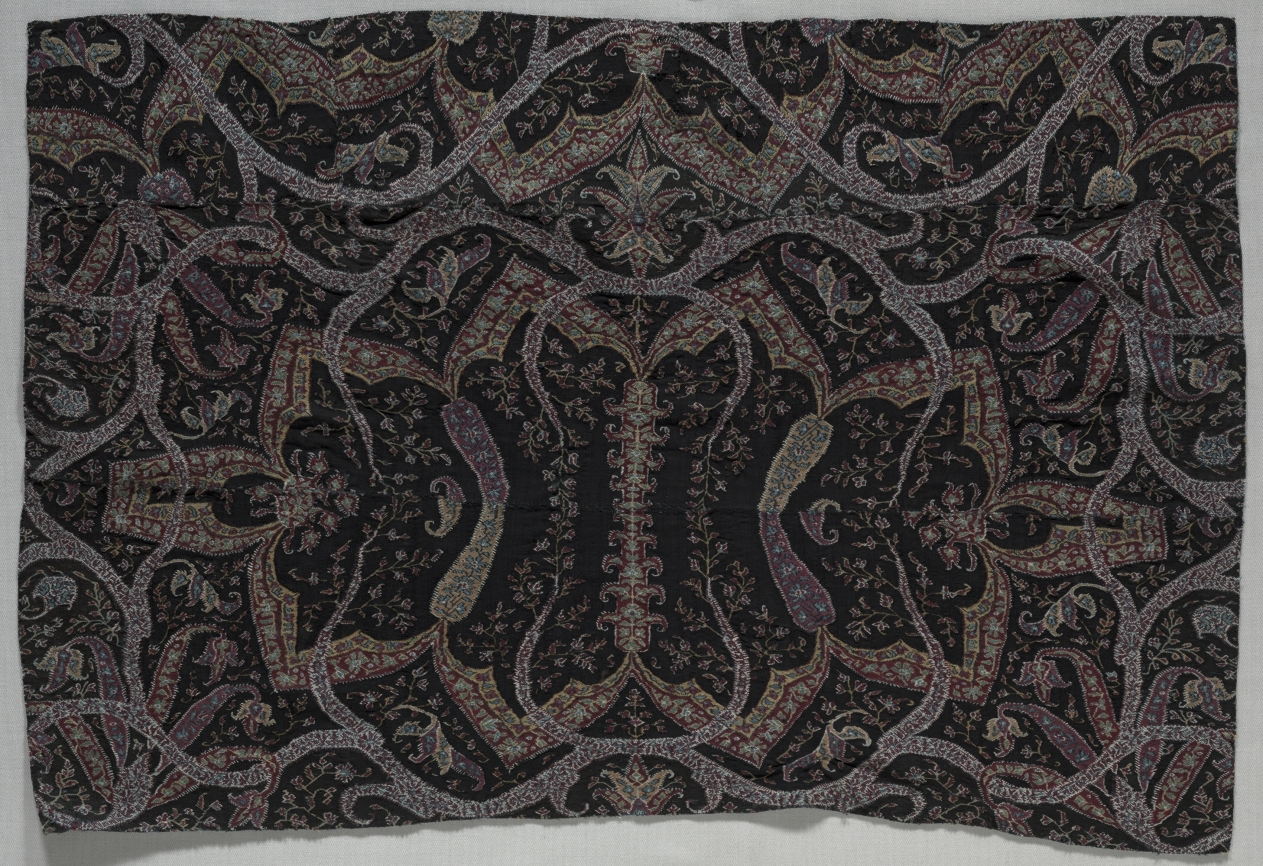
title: Fragment of a Shawl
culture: India, Kashmir, mid-19th century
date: mid 1800s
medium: tapestry twill; wool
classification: Textile